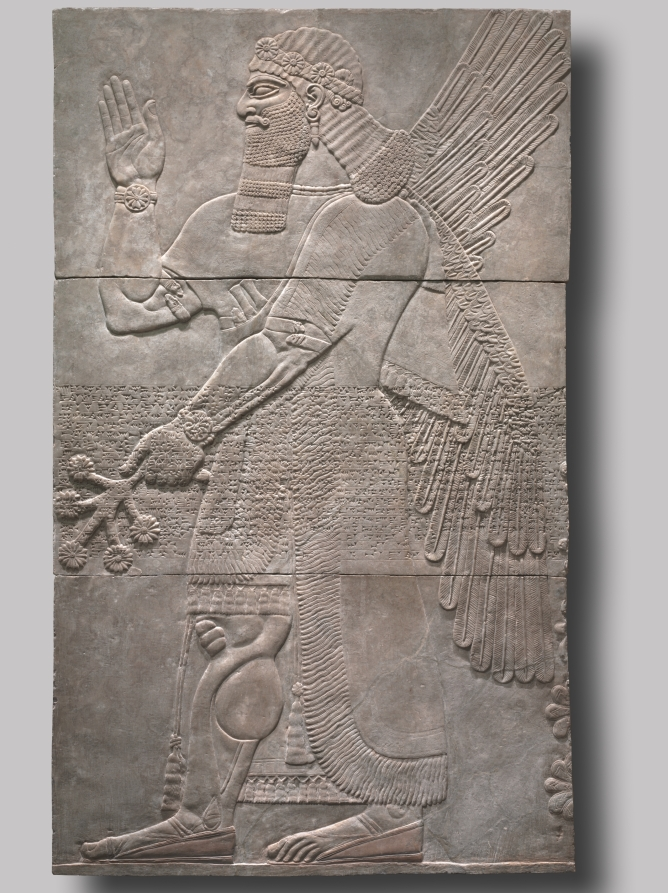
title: Saluting Protective Spirit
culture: Neo-Assyrian (911–609 BCE), Iraq, Nimrud, Northwest Palace, reign of Ashurnasirpal II (883–859 BCE)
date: 883–859 BCE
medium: gypsum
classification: Sculpture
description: Striding forward with muscular arms and legs, this winged deity offers a gesture of salutation along with symbols of agricultural bounty. Inscribed with an account of the Assyrian king Ashurnasirpal II's military conquests and victories, this relief once stood alongside hundreds of similar ones that decorated the palace at Nimrud.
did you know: The details of his garments are painstakingly rendered; he wears a long fringed cloak with tassels over a shorter kilt and an under tunic.